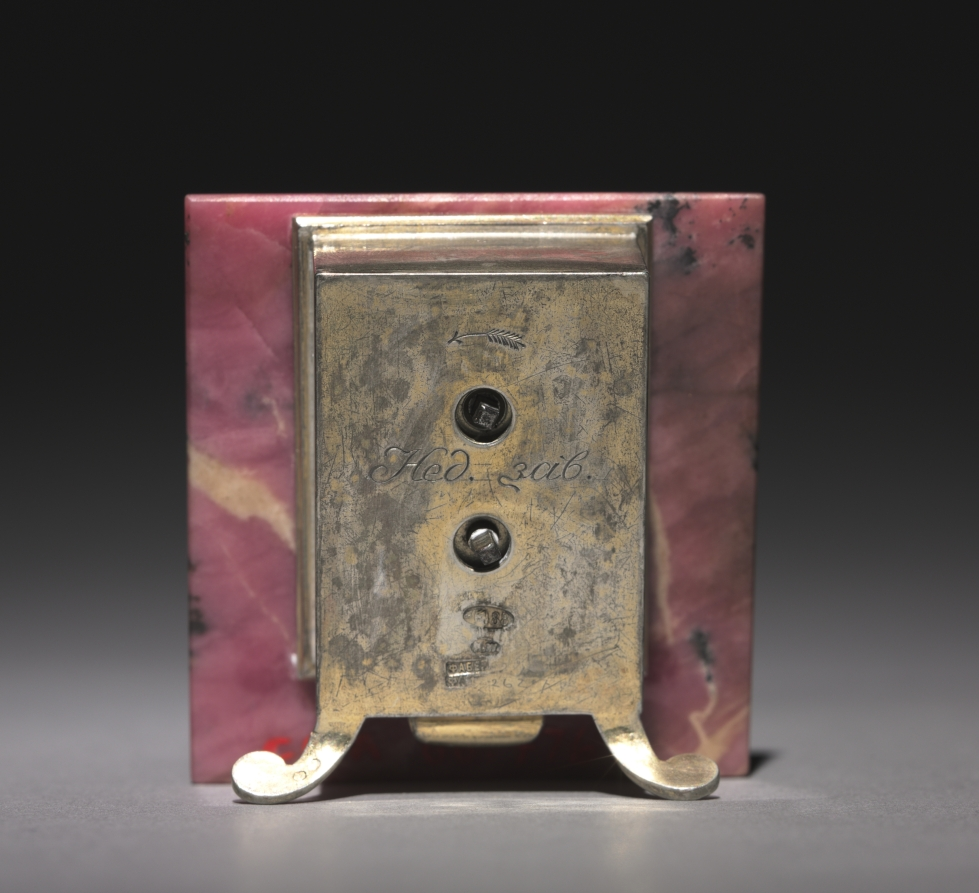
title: Clock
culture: Russia, St. Petersburg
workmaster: Henrik Wigström (Russian, 1862–1923)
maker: House of Fabergé (Russian, 1842–1918)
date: c. 1905–15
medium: rhodonite, silver, enamel, diamonds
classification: Timepiece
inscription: 88, Kokoshnik, lower-case alpha in script [assay mark for St. Petersburg, 1882-99]; H.W. [initials for workmaster Henrik Wigström]; Fabergé (in Cyrillic); 26217 scratched; swan. Fabergé in script on dial of clock; an abbreviation of "weekly wind" engraved in Cyrillic script on back.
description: The use of Russian hardstones in creating precious objects became a hallmark of design from the House of Fabergé. Easily carved, these minerals were sourced largely from the western region surrounding the Ural Mountains. Fabergé's workmasters used colorful stones such as agate, nephrite (jade), lapis lazuli, rock crystal, and rhodonite, seen here in this small desk clock, to create and embellish flower studies, animal figures, and all manner of luxurious accessories. Bright pink rhodonite was among the rarest, and consequently most expensive, specimens used by the House of Fabergé.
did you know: The bright pink color of this small desk clock is a result of manganese, the principle mineral found in rhodonite.